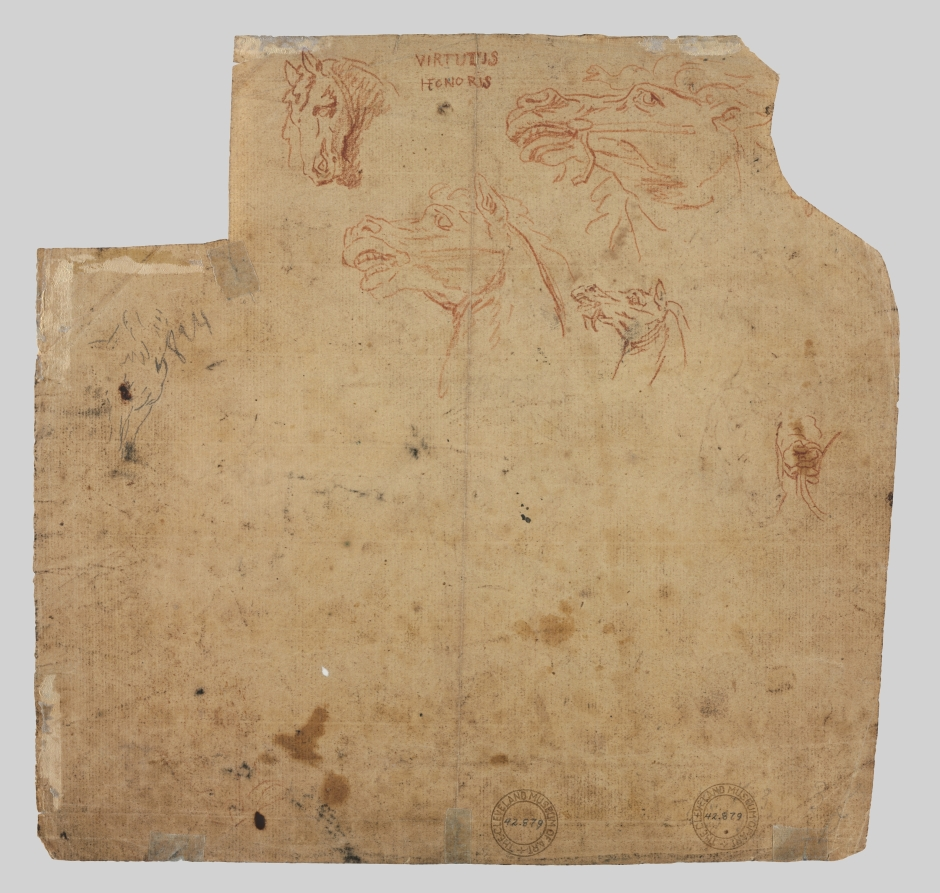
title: Sketches of Horses (verso)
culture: Flanders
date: 1600s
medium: red chalk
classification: Drawing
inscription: upper center, in red chalk: VIRTUTJS / HONORJS ; left center, in graphite: 814 ; lower right, in graphite: [illegible, beneath CMA stamp] 3 3 / [9?]